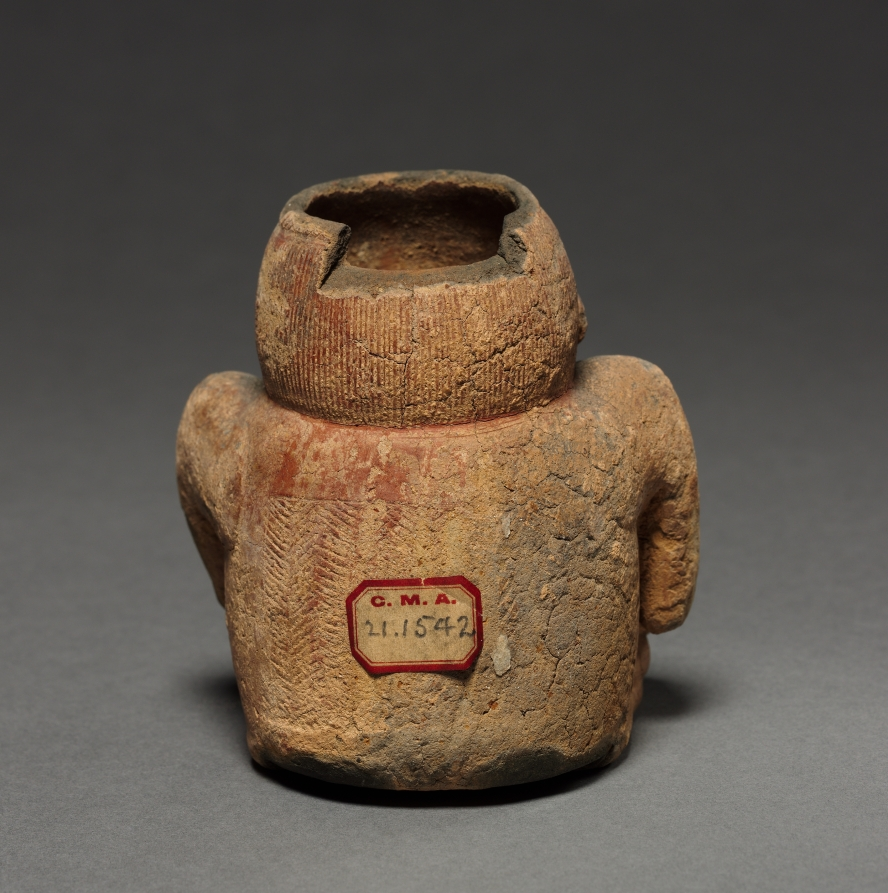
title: Figure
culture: Colombia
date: before 1550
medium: red ware with incised patterns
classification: Ceramic